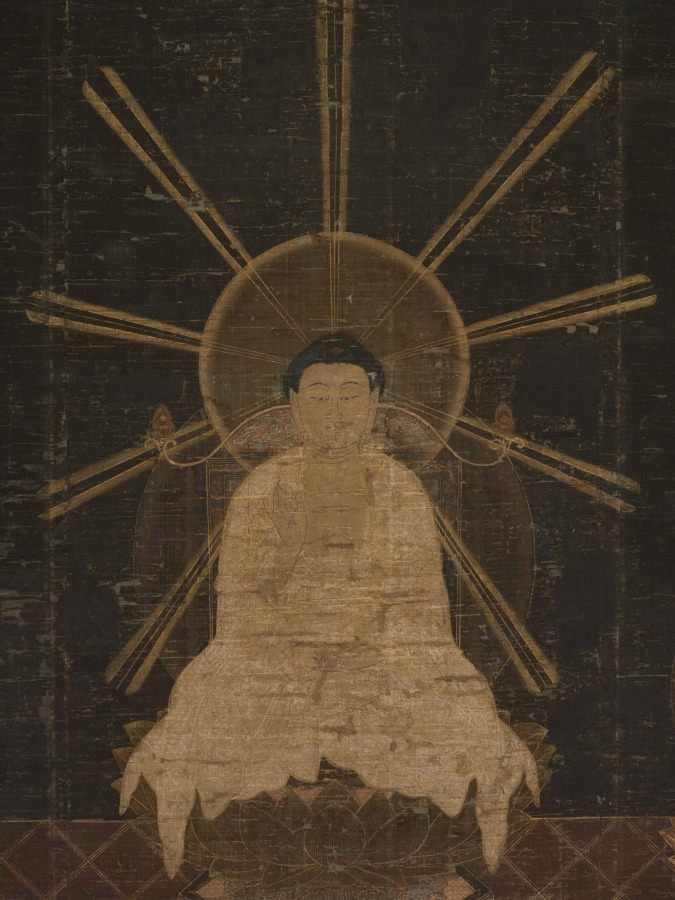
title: Shakyamuni Triad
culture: Japan, Kamakura period (1185–1333)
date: c. 1200–1333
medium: hanging scroll; ink, color, gold and cut-gold on silk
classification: Painting